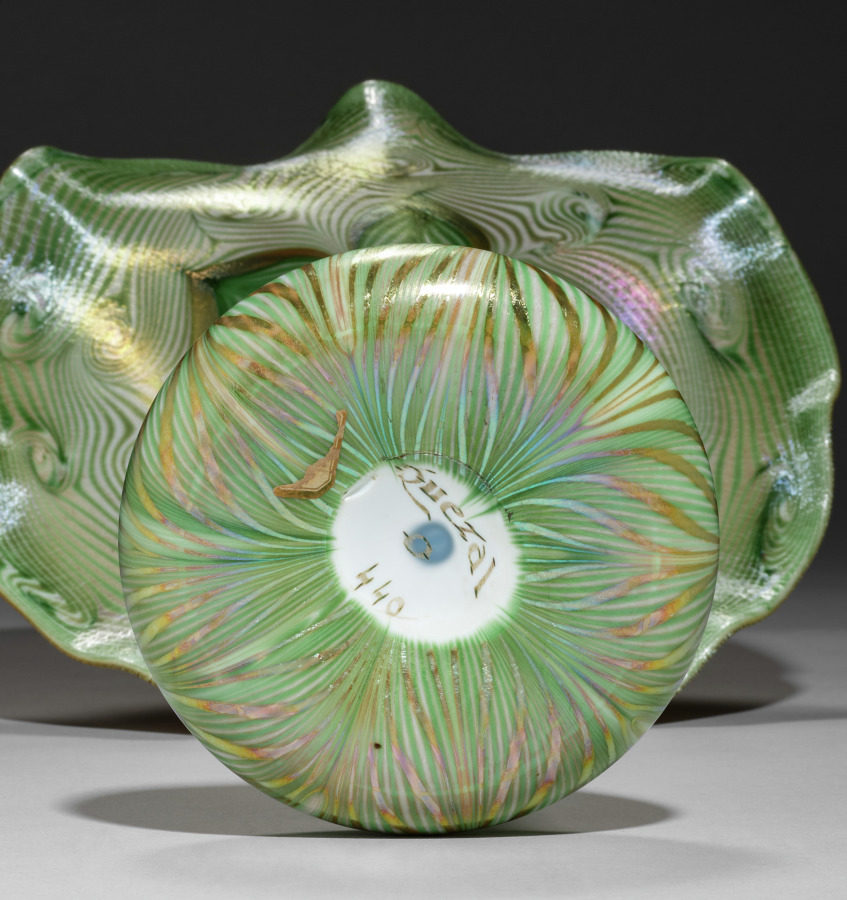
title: Jack-in-the-Pulpit Vase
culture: America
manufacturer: Quezal Art Glass and Decorating Company (American, 1901–1924)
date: c. 1900–1920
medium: blown glass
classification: Glass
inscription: engraved on underside: Quezal/-O-/440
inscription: affixed to underside: remnant of an original paper label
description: The Quezal Art Glass and Decorating Company was begun by former employees of Louis Comfort Tiffany as a rival operation in 1902. With its expressive form and brilliant golden iridescence, this vase represents the finest work produced by the Queens, New York, company in the Art Nouveau style.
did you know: The Quezal Art Glass and Decorating Company was named after a rare breed of South American bird, the quetzal, known for its colorful iridescent plumage.